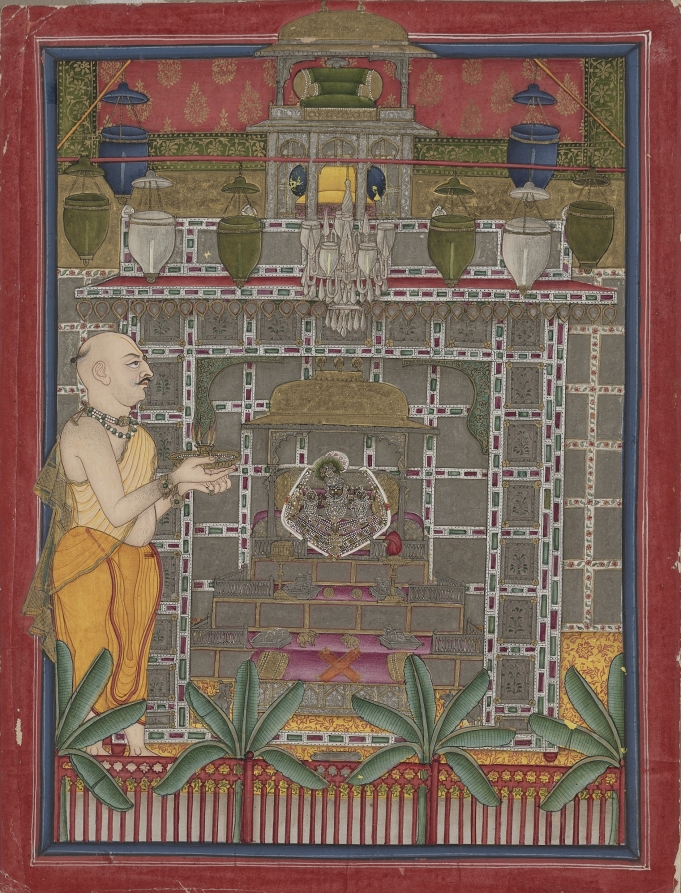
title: Maharao Kishor Singh II of Kota (r. 1819–28) Worshiping Krishna as Brij Rajji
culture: Northwestern India, Rajasthan, Rajput Kingdom of Kota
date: c. 1825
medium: Gum tempera, silver, and gold on paper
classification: Painting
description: The ruler of the small princely state of Kota, dressed as a priest of the Pushti Marg sect, holds a lamp with five flames. He pays homage to a triad of metal images with Krishna in the center, flanked by two consorts, enshrined in a small kiosk lined with metallic panels designed to reflect light. This icon is worshiped only in Kota. A multitude of glass lamps hang from the ceiling, and toys and games to amuse Krishna and his companions have been arranged on the steps leading up to the altar, including brass elephants, silver cows, balls, and a pachisi board.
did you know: Mirrors line the back of the shrine.